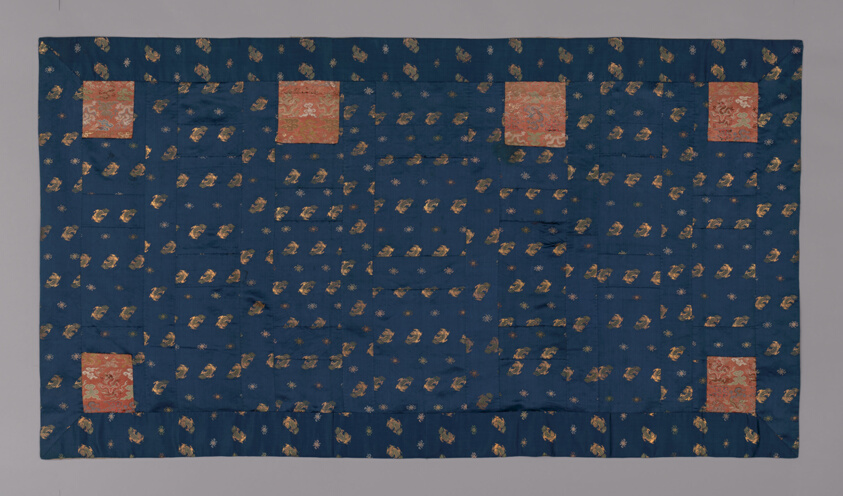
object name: Textile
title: Kesa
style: late edo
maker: Japan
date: late Edo period (1789–1868), 1800/68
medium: Hiri, yô, jô: silk and gold-leaf-over-lacquered-paper-strip, warp-float faced 7:1 satin weave with 1:3 ‘S’ twill interlacings of secondary binding warps and supplementary brocading wefts; shiten and nitens: silk and gold-leaf-over-lacquered-paper-strip, warp-float faced 4:1 satin weave with weft-float faced 1:2 ‘Z’ twill interlacings of secondary binding warps and supplementary patterning wefts; lining: silk, plain weave; paper, interlining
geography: Japan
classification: textile; weaving; liturgical - buddhist